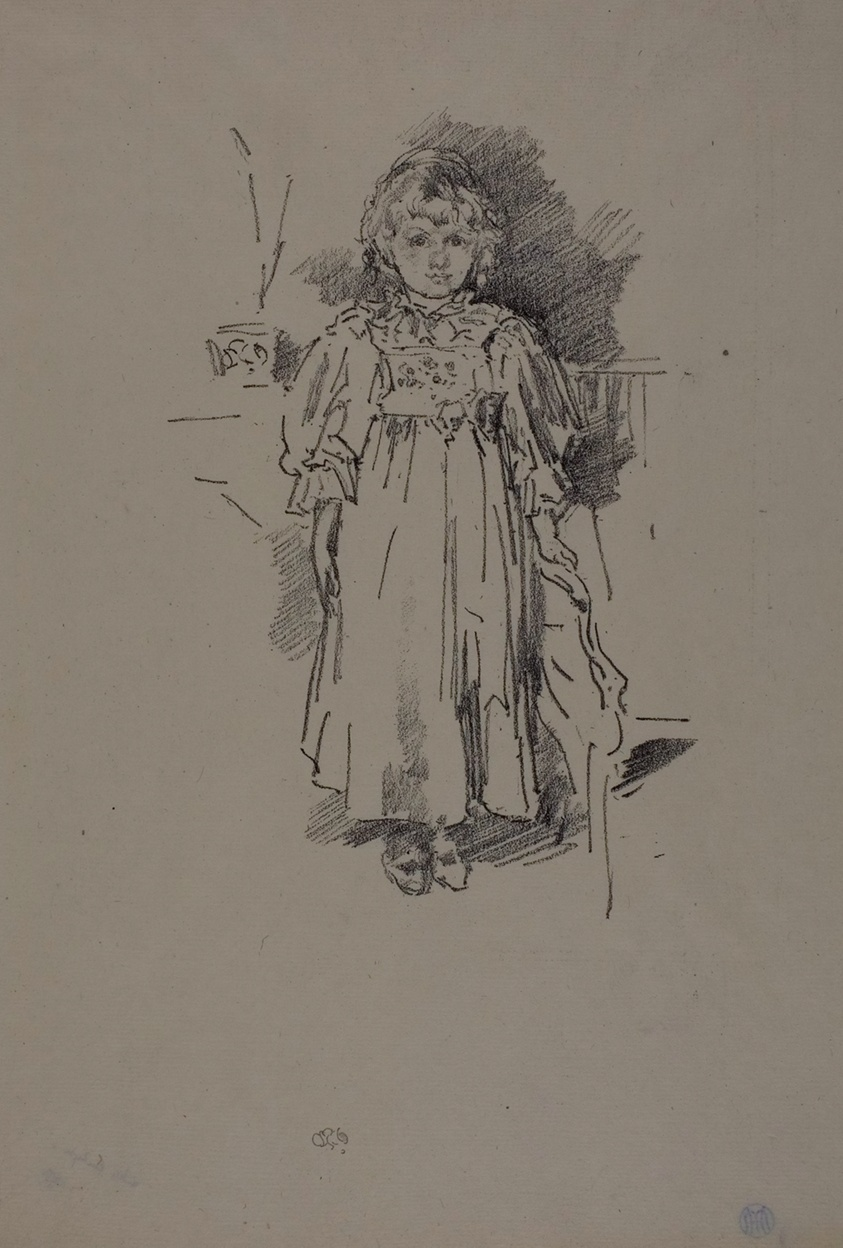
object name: Print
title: Little Evelyn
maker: James McNeill Whistler (American, 1834-1903)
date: 1896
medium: Transfer lithograph in black on cream laid paper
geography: United States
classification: transfer lithograph; lithograph; print; prints and drawing; paper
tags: children